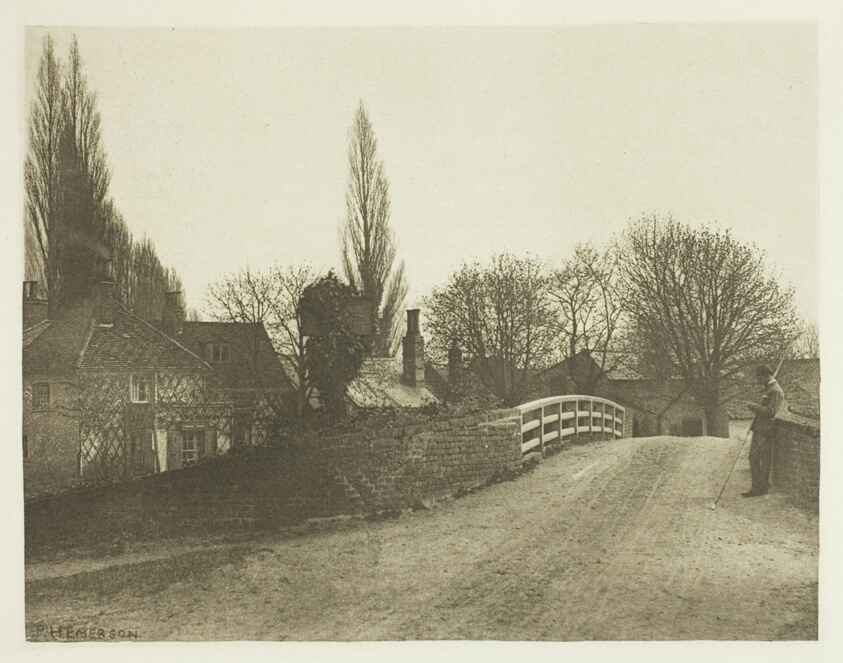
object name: Photograph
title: The Crown Inn, Borxbourne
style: 19th century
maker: Peter Henry Emerson (English, born Cuba, 1856–1936)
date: 1880s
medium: Photogravure, plate XXI from the album "The Compleat Angler or the Contemplative Man's Recreation, Volume I" (1888)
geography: England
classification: photogravure; photomechanical process; photography; photograph